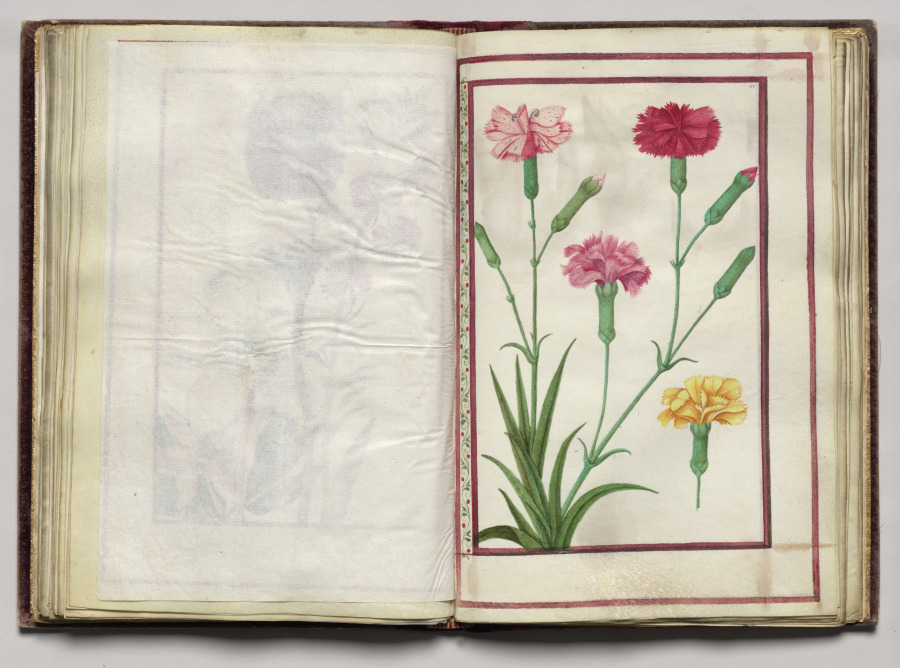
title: Carnations, folio 31 (recto), from Florilegium (A Book of Flower Studies)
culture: France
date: 1608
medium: watercolor, ink, silver, and gold over occasional traces of pencil, on vellum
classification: Bound Volume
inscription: Dated: Poitiers 1608 (on frontispiece) Signed: On frontispiece in black ink, lower right: Van Kuyk Notation on drawing: Frontispiece: in pencil, lower margin: * élève de Van Kessel, peintre flammand (* in pencil also appears in front of Van Kuyk's name).